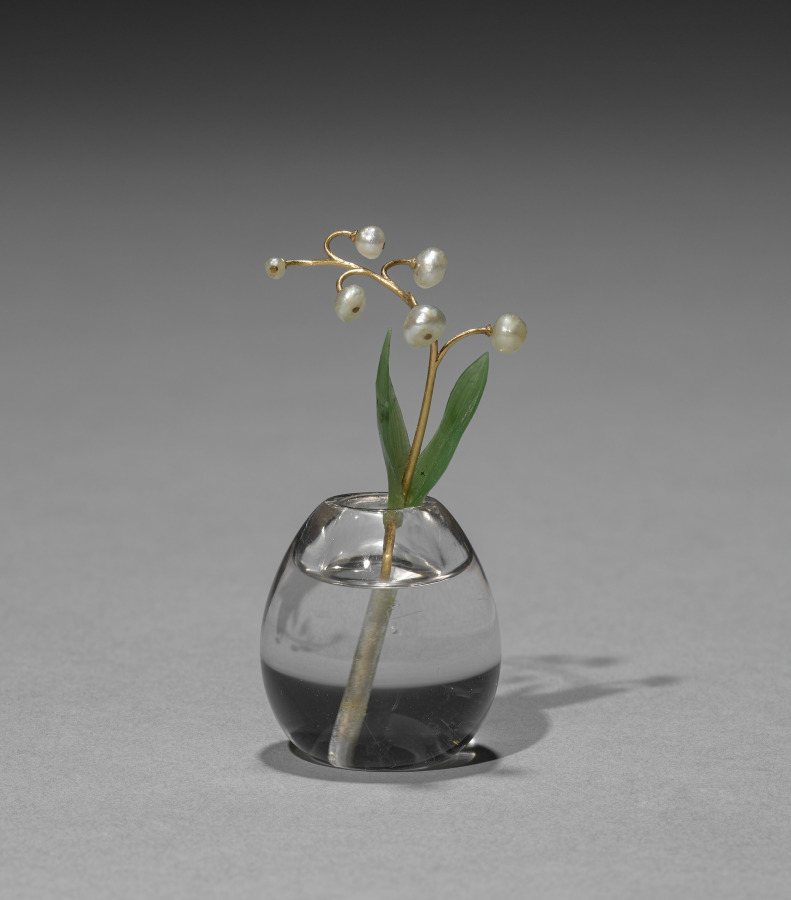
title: Flower Study of a Miniature Lily of the Valley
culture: Russia, St. Petersburg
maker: House of Fabergé (Russian, 1842–1918)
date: c. 1885–1915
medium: pearls, jade, rock crystal, gold, diamonds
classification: Miscellaneous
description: A small, carved rock crystal vase holds this lily of the valley study. The pearls, forming the flower’s buds, are drilled and attached to the remarkably slim gold stem. The hand-cut nephrite (jade) leaves enhance the naturalistic aura of the flower. Fabergé’s inspiration for his flower studies is said to have come from the floral brooches of precious stones that were made in the 1700s for Catherine the Great as well as from the Japanese art of flower arranging, known as ikebana.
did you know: Small and delicate, Fabergé’s flower studies were given as intimate gifts to friends by Tsarina Alexandra and others in the court. She kept them in all the palaces as a reminder of spring during the harsh Russian winters.